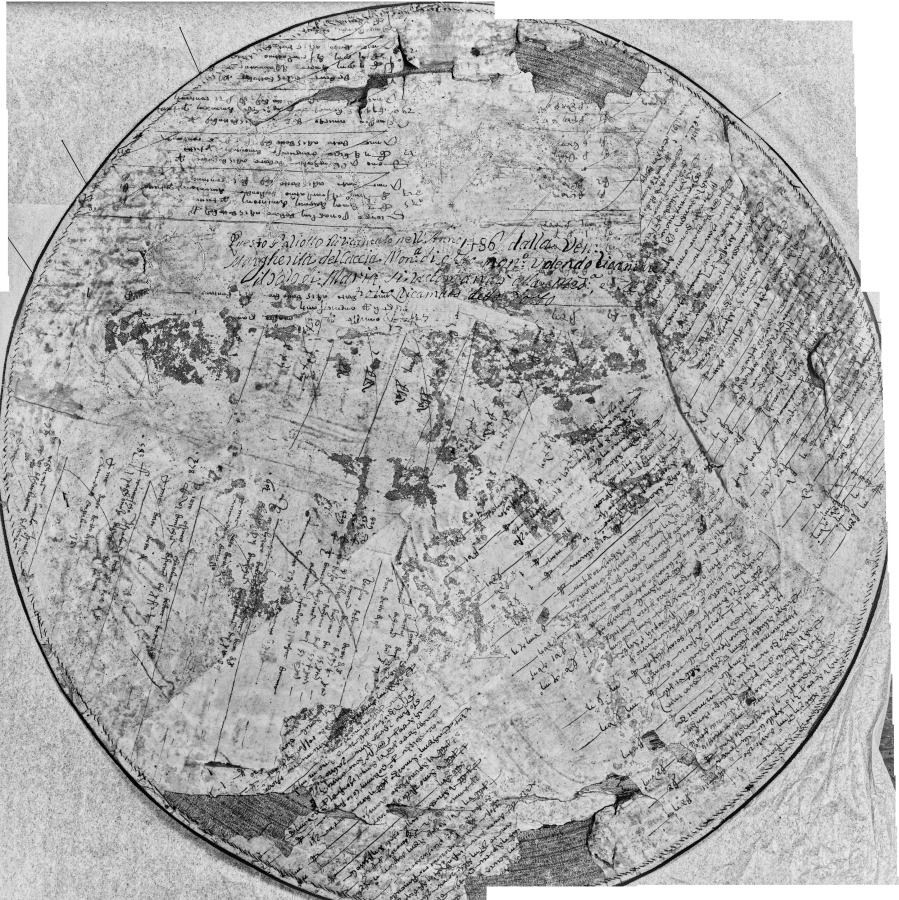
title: Embroidered Tondo from an Altar Frontal: The Coronation of the Virgin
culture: Italy, Florence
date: 1459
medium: Embroidery with gold, silver, and silk thread; split, satin, and couching stitches, or nué (shaded gold)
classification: Embroidery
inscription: the embroidery is backed by an old reused parchment with Latin writing over which in Italian is penned an inscription: "This pallioto was embroidered in the year 1486 by the venerable Margherita del Caccia nun of this monastery. . ." [It is difficult to know to what extent one should rely on this inscription as the style and technique both point clearly to an earlier date.]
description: This masterpiece of Florentine embroidery takes the circular form called a tondo and was likely once attached to an altar frontal. The scene depicts the coronation of the Virgin, the final and culminating event in the narrative cycle of her life. Honoring her as queen of heaven, Christ places the crown on his mother’s head. They are surrounded by eight angels as well as Saints Verdiana and John Gualberto, both much esteemed in Florence, creating a joyous scene. During the Renaissance, Florence emerged as an important center for a specific type of embroidery known as or nué, or shaded gold. This stunning technique used metal and silk threads, as seen here, to create pictures that rivaled paintings. It was frequently used for vestments and altar frontals.